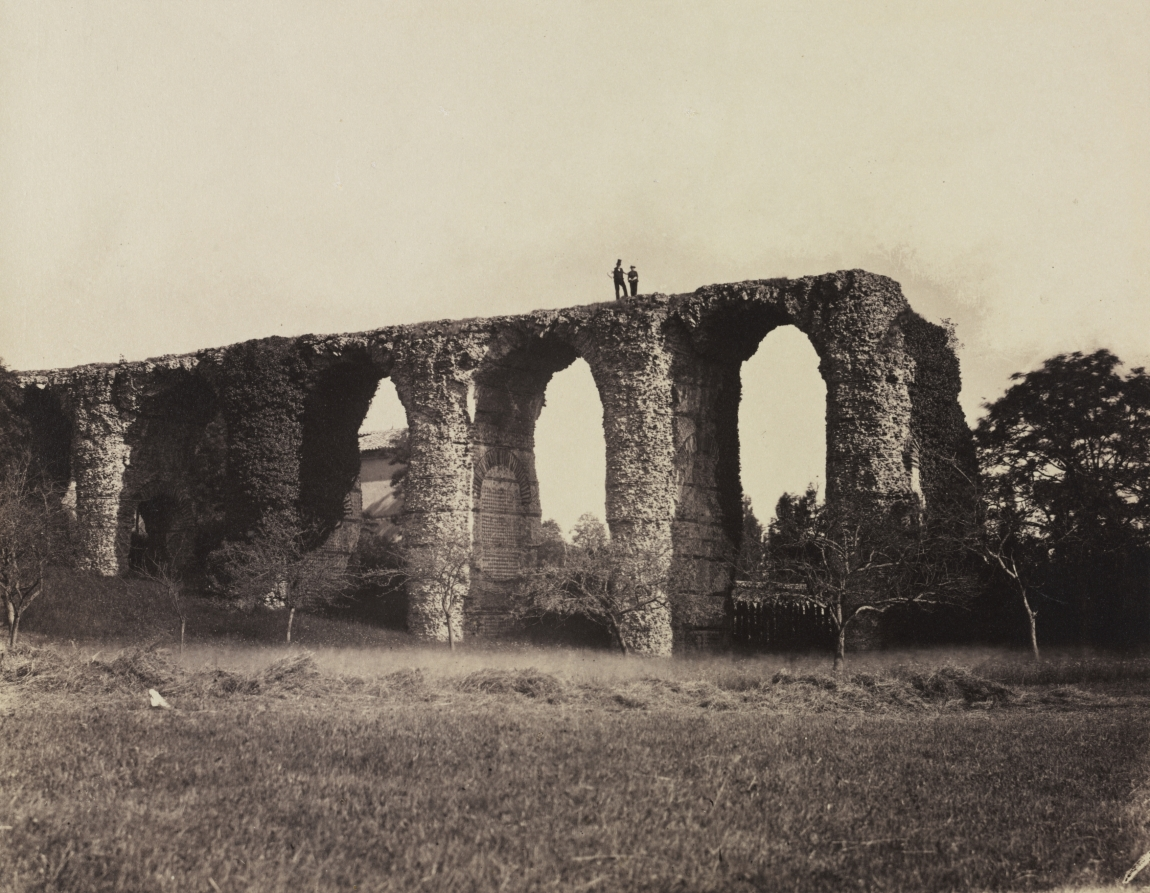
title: Roman Aqueduct, Beaunant, France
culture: France, 19th century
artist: F. Chabrol (French)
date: c. 1857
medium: albumen print from wet collodion negative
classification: Photograph